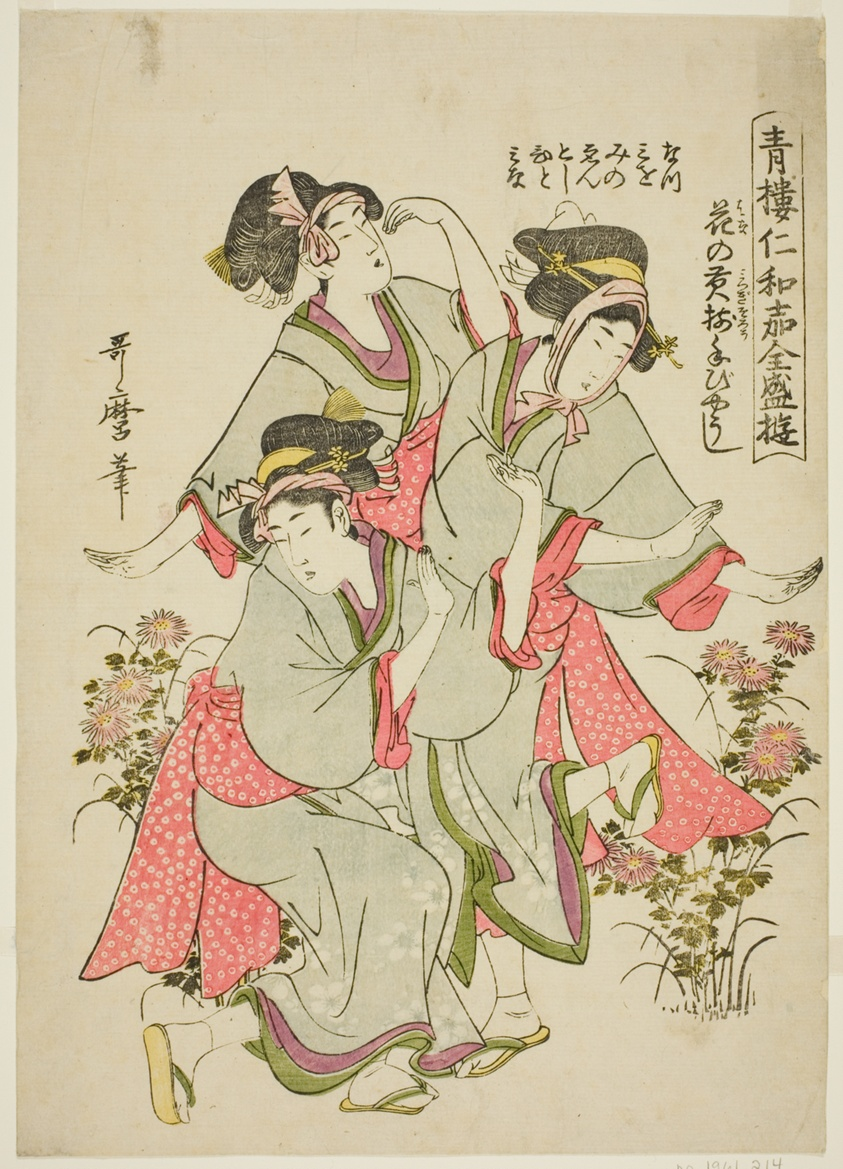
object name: Print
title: Seiro niwaka zensei asobi: Hana no mitsugi sorou tebyoshi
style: Japanese (culture or style)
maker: Kitagawa Utamaro 喜多川 歌麿; Japanese, 1753 (?)-1806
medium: Color woodblock print; aiban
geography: Japan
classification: woodblock print; print; asian art